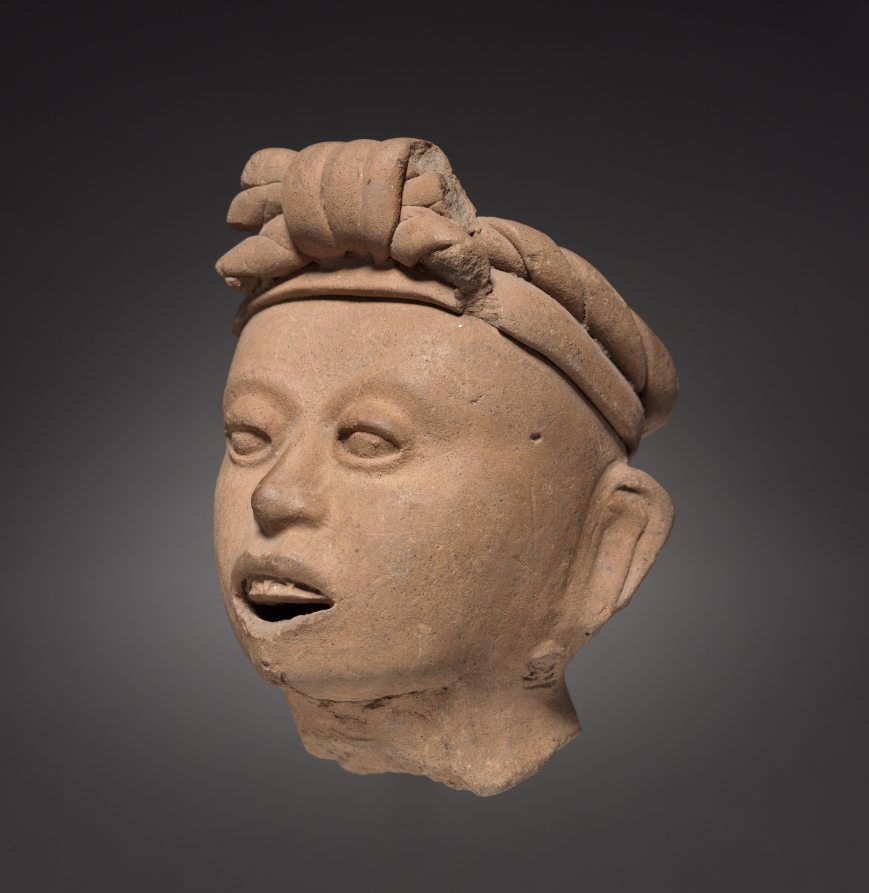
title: Head Fragment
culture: Mexico, Veracruz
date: 900–1200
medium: molded and modeled pottery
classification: Sculpture